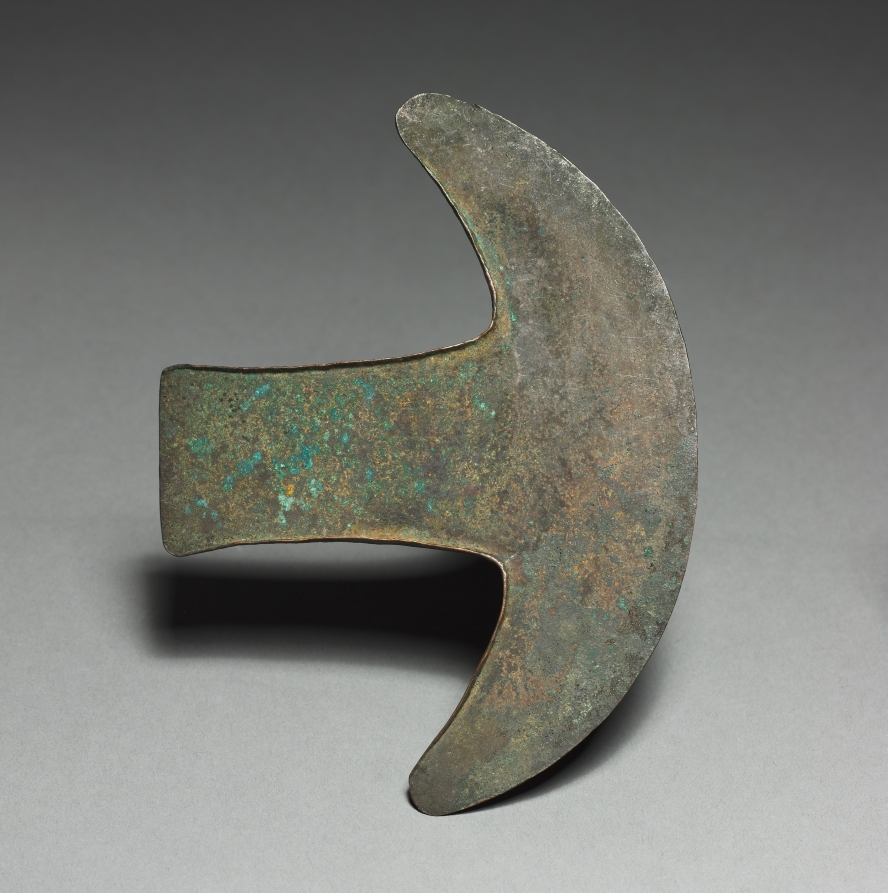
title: Axe-shaped Implement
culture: Mexico, Oaxaca, Mixtec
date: 1200–1519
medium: cast and hammered copper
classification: Metalwork